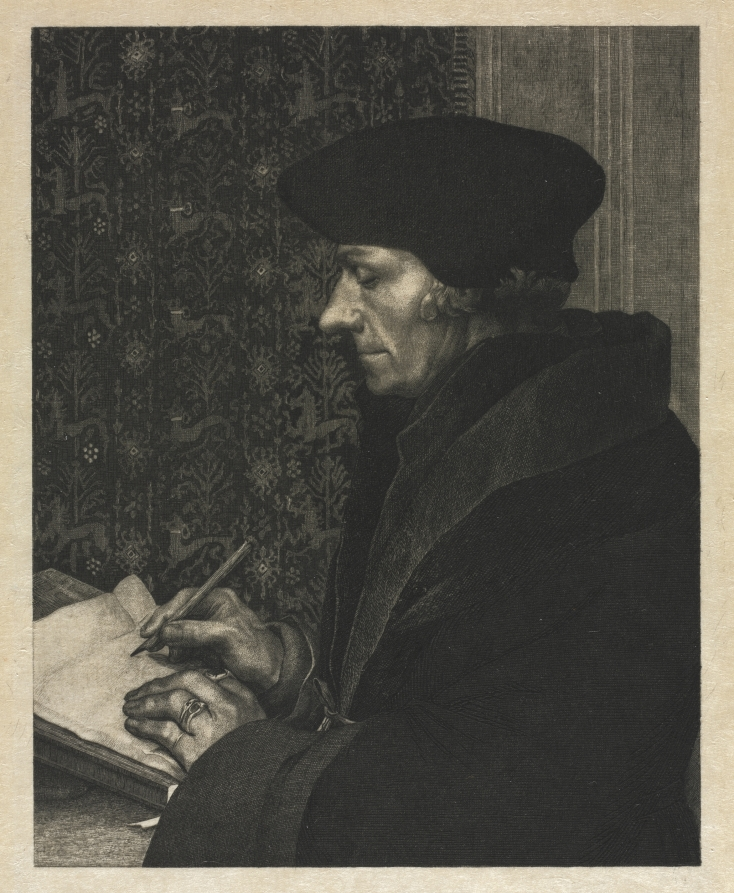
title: Erasmus, after Holbein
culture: France, 19th century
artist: Félix Bracquemond (French, 1833–1914)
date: 1863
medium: etching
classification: Print